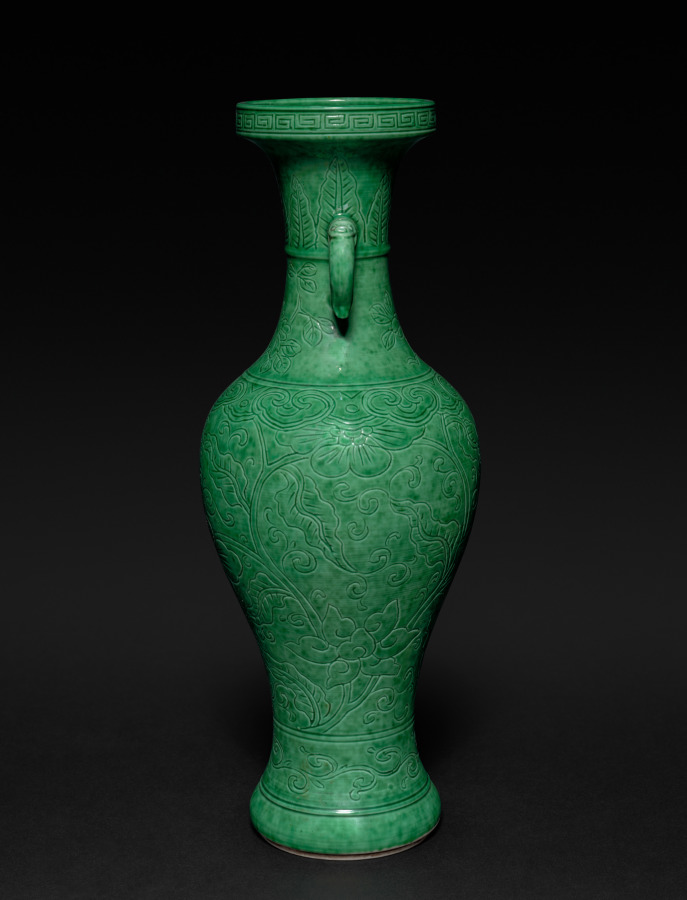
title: Vase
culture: China, Jiangxi province, Jingdezhen kilns, Qing dynasty (1644-1911), Kangxi reign (1662-1722)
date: 1662–1722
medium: glazed white porcelain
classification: Ceramic